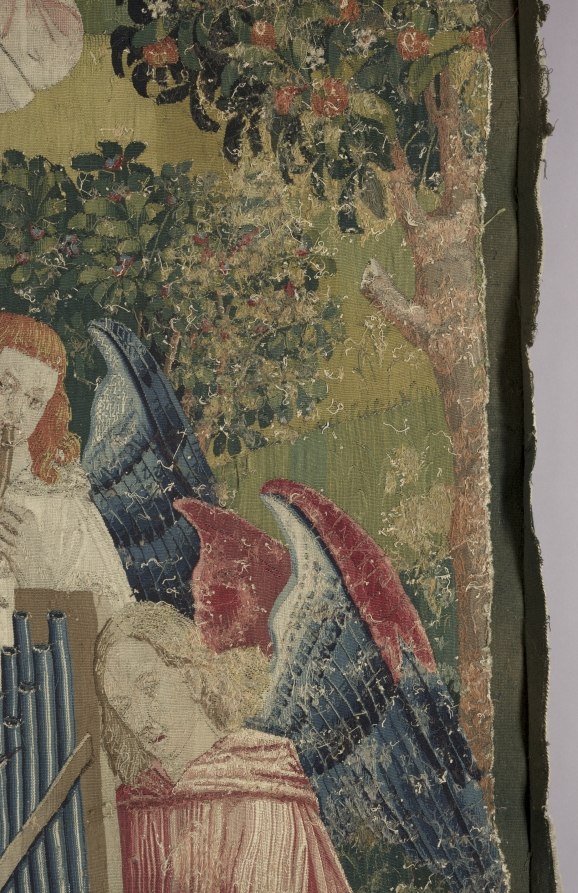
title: The Triumph of Eternity (from Chateau de Chaumont set)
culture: France, Lyon(?), early 16th century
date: 1512–15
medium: silk and wool; tapestry weave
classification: Tapestry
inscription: French verse in Gothic letters translates as follows: "Nothing triumphs by right authority, Unless it be conducted by Eternity. Nothing is permanent beneath the firmament, But above us triumphs Eternity."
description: The Triumph of Eternity is represented by the Coronation of the Virgin. Dressed in crimson velvet with an opulent brocaded velvet shawl, the Virgin is seated in the center as two angels hold a crown over her head. Five musical angels surround her playing an organ, recorder, straight cornetto, harp, and lute, while another sings from an open music book. The scenes in the set display a conservative style in which the figures are placed in shallow landscapes, thereby ignoring pictorial innovations for depicting space and mass. The verse in Old French at the top states: Nothing triumphing by due authority Remains permanent and durable. Nothing is permanent under the heavens, But above, eternity triumphs.